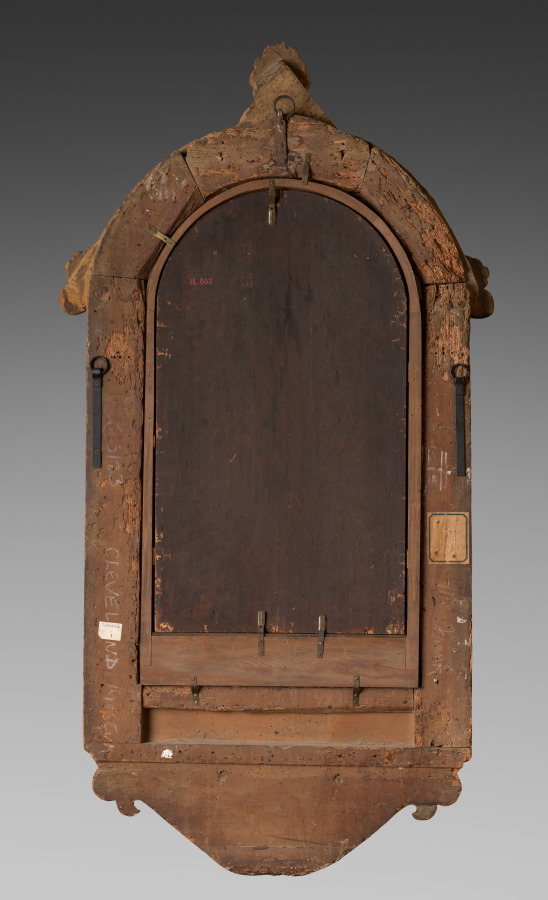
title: Virgin and Child with Angels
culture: Italy, Florence, 15th century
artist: follower of Fra Filippo Lippi (Italian, c. 1406–1469)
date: c. 1460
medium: tempera and gold on wood panel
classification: Painting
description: This painting, produced by one of Fra Filippo Lippi’s many imitators in the city of Florence, is very close to the composition of the now lost central panel of the triptych commissioned by the Medici family in 1457. It was purchased by Mrs. L. E. Holden before the museum’s acquisition of the two flanking panels of Saint Anthony Abbot and Saint Michael. It has been suggested that this painting is a copy of the original lost central panel of Fra Filippo’s triptych of 1457.